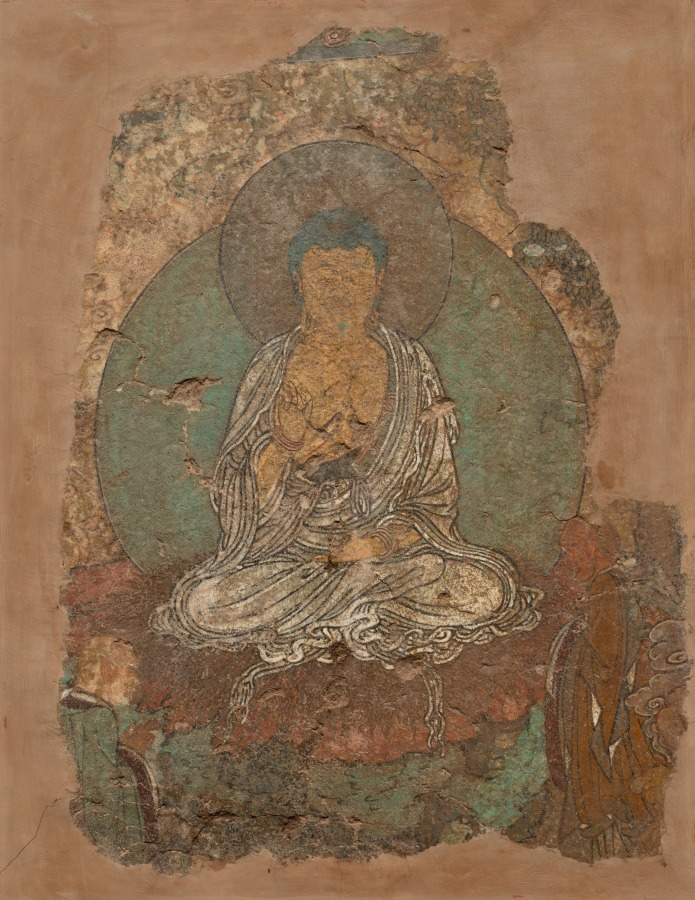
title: Buddha in the Preaching Attitude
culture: China, Tang dynasty (618-907) - Song dynasty (960-1279)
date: 618–1279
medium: Fresco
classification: Painting